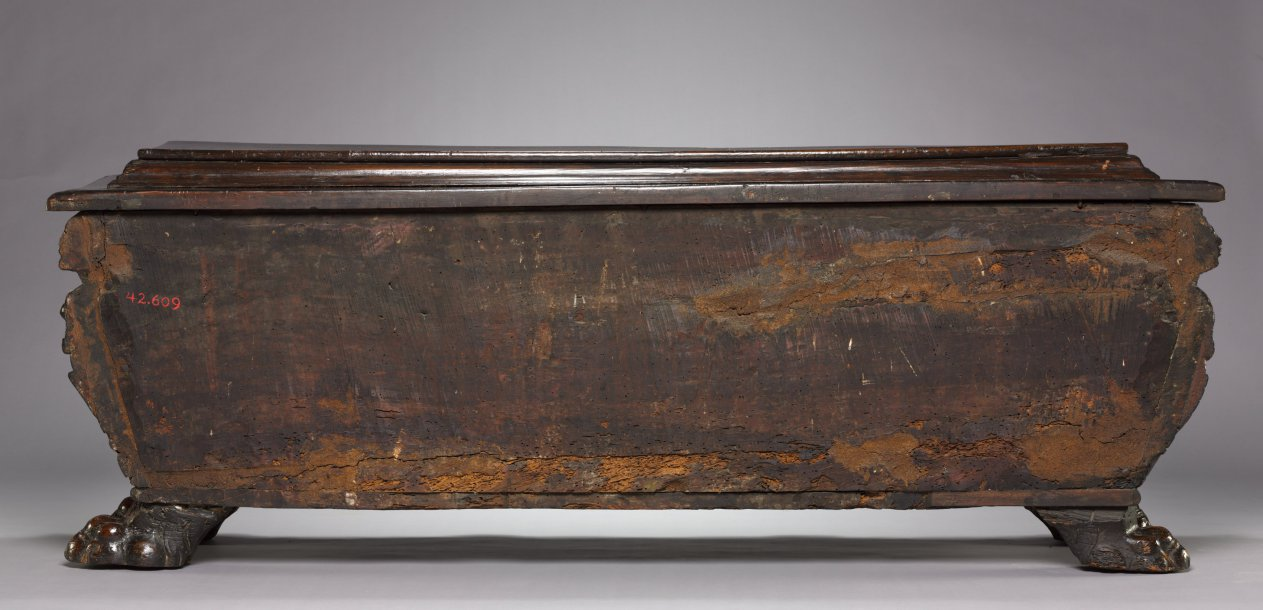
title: Marriage Chest (Cassone)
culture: Italy, early 16th century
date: early 1500s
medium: walnut with traces of gilding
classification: Furniture and woodwork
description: Large storage chests resembling ancient Roman burial vaults-a popular collectible among wealthy families during the Renaissance-were often associated with an important marriage and contained the wife’s dowry of clothes and precious objects. This particular example displays the arms of the Spada Family of Rome amidst a richly carved façade on a gilded ground. Sometimes cassoni were carried in the marital procession from the bride’s home to that of her future husband, emphasizing the power and wealth of both families.